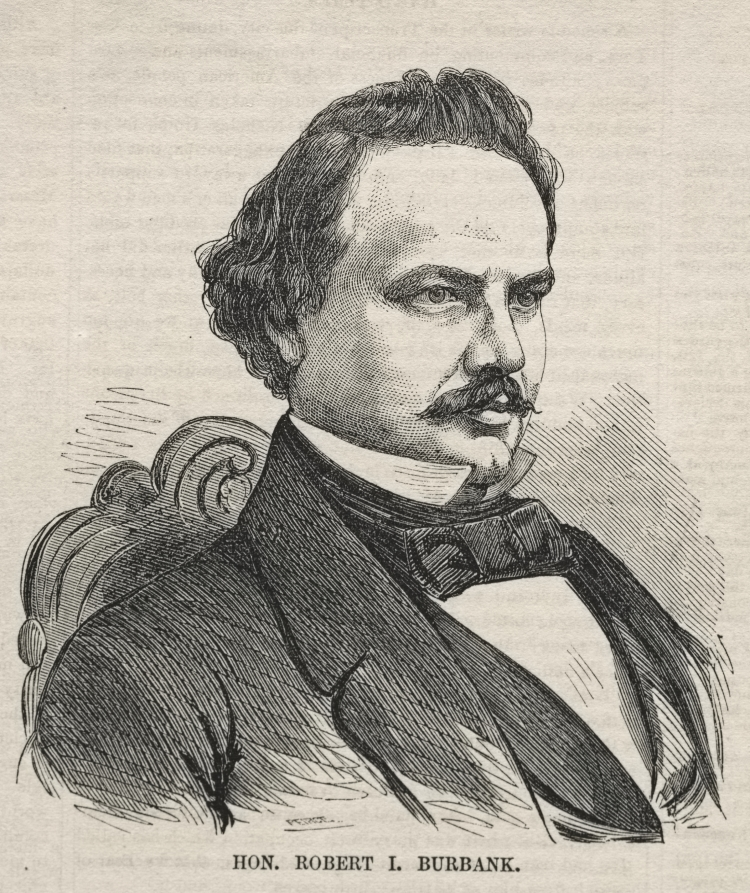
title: Hon. Robert I. Burbank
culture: America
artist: Winslow Homer (American, 1836–1910)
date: 1857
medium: wood engraving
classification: Print